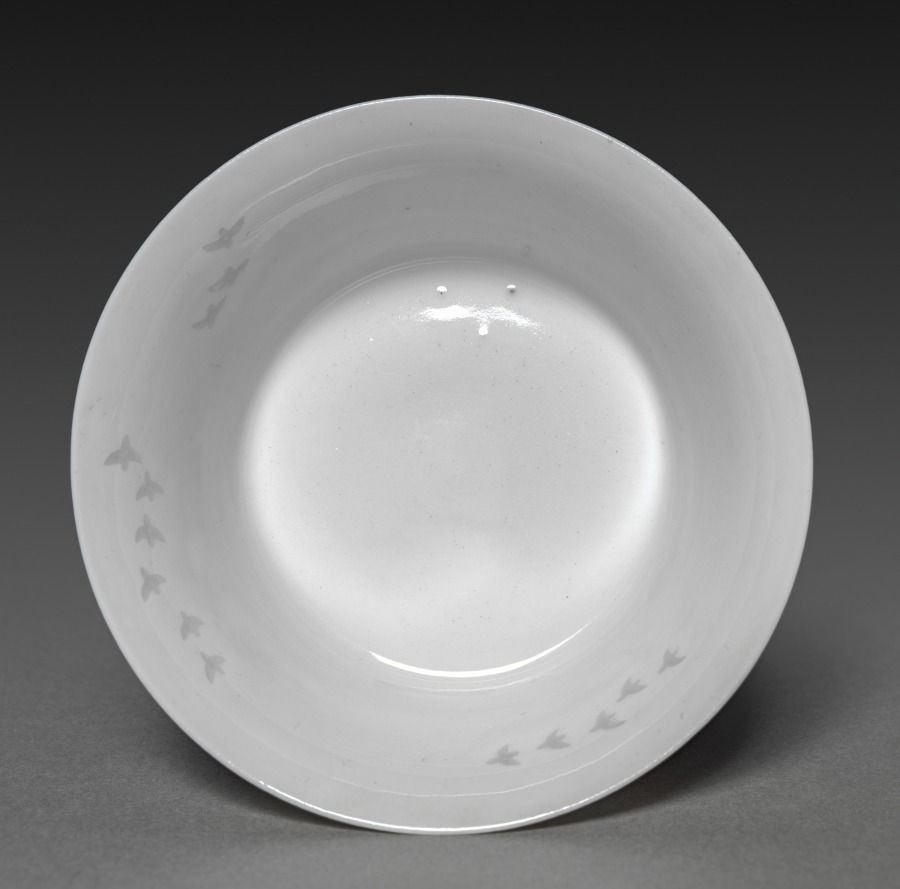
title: Wine Cup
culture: Japan, Edo period (1615–1868)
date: 1700s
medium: porcelain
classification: Ceramic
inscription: inscription in underglaze blue on base.